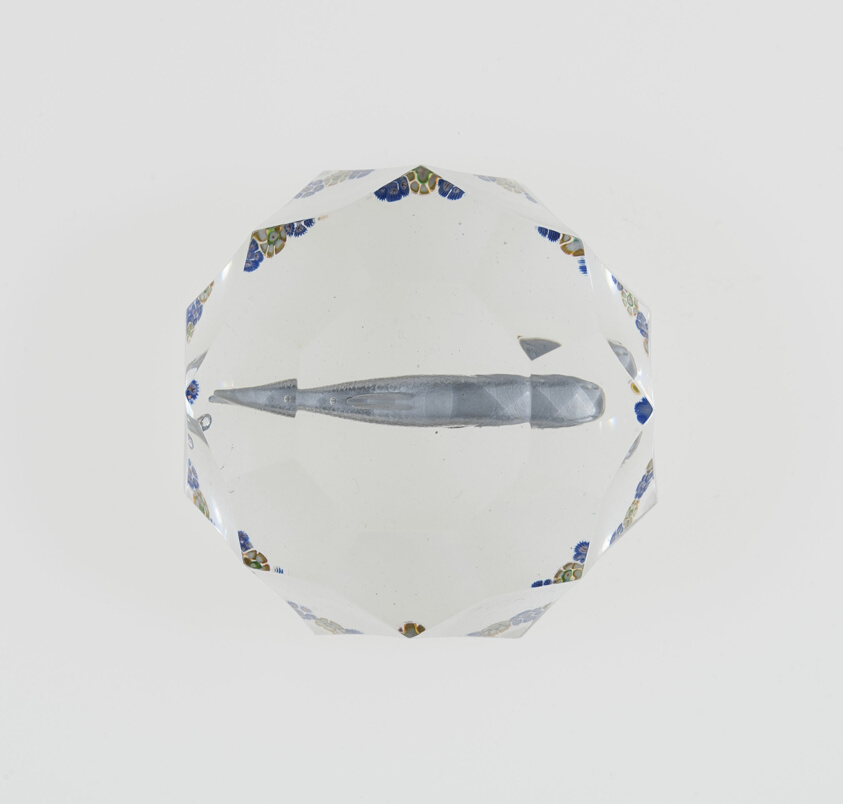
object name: Glass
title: Paperweight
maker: Saint-Louis Glassworks (Cristalleries de Saint-Louis); Lorraine, France, founded 1586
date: Mid 19th century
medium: Glass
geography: Saint-Louis-lès-Bitche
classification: paperweight; glass